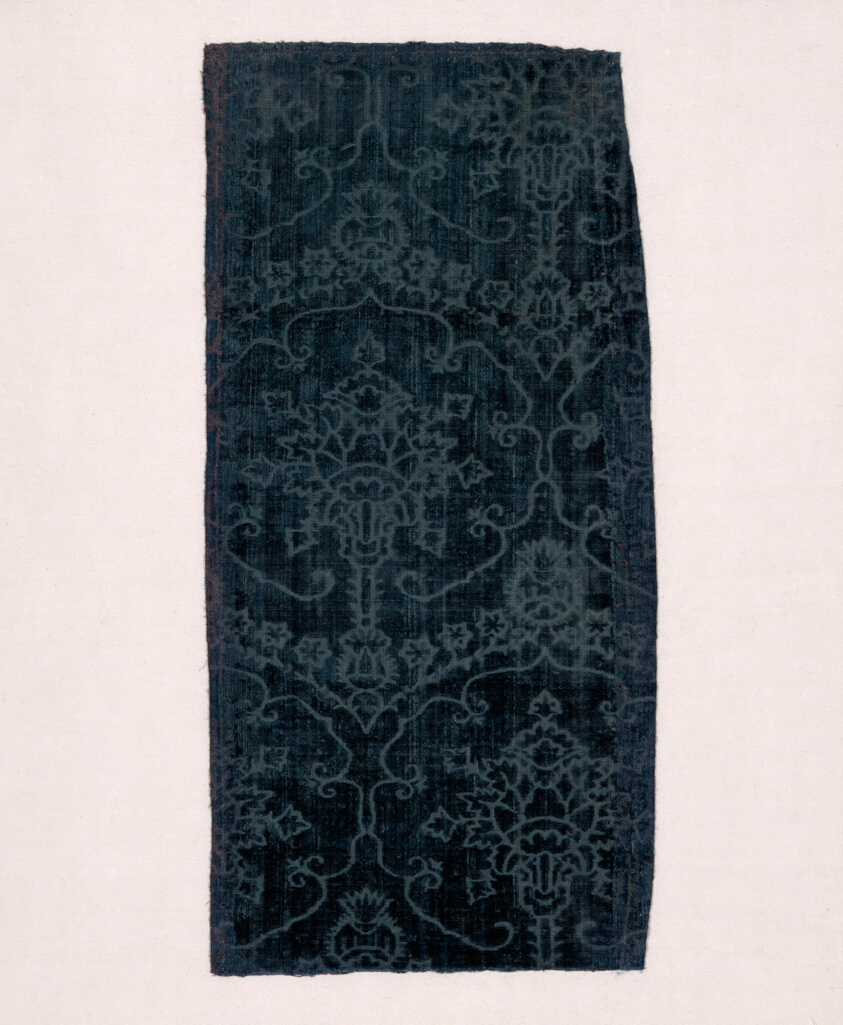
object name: Textile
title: Fragment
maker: Italy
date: 1450/1500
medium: Silk, warp-float faced satin weave with supplementary pile warps forming cut voided velvet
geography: Italy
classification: textile; weaving - velvet